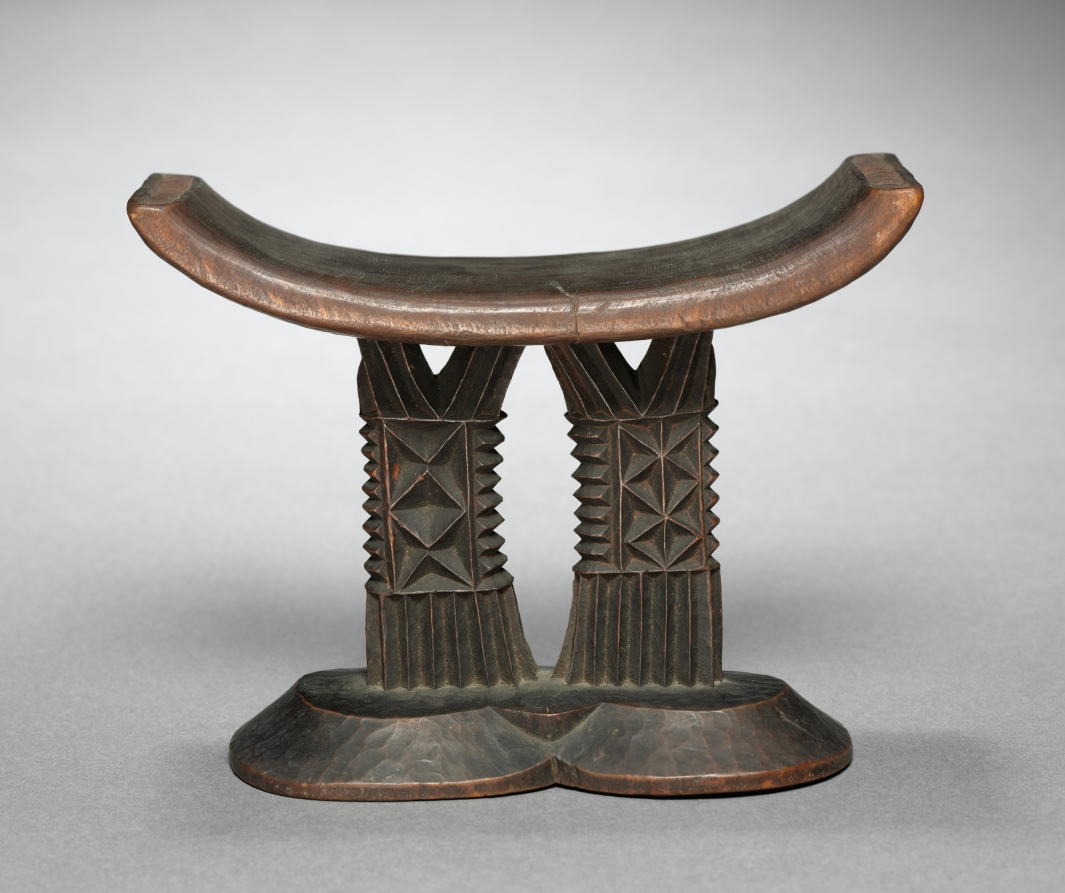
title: Headrest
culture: Southern Africa, Zimbabwe or Mozambique, Shona-style blacksmith-carver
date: c. 1910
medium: wood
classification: Furniture and woodwork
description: Headrests allowed Shona men to protect their elaborate braids. Placed under the neck or chin, frequent contact with hair and hairdressing products darkened its top. Tool marks show how it was smoothed only where the skin would make contact. Linked intimately to their owner, headrests often became burial goods or heirlooms. Recent research suggests Shona headrests symbolized women; small projections on the supports likely reference scarification marks worn by women of marrying age. As only mature men used headrests, it reinforces their female symbolism and women’s societal importance as wives.